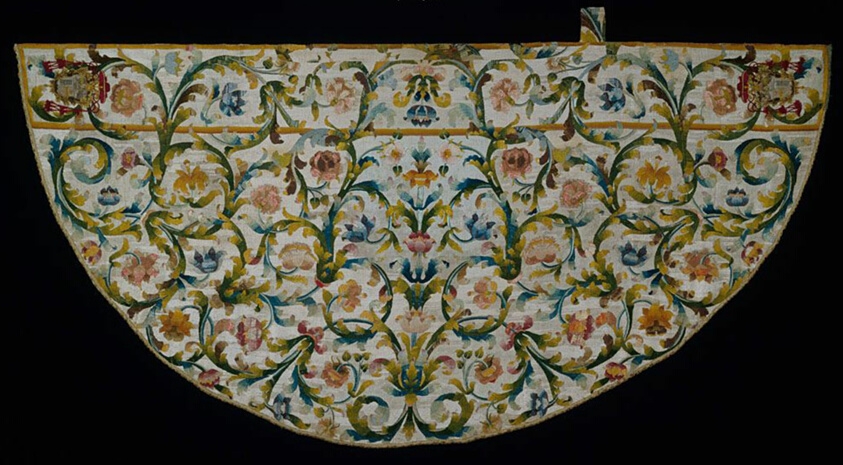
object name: Textile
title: Cope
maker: Spain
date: 1675/1700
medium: Linen, plain weave; embroidered with silk in satin, padded satin and split stitches; laid work and couching; lined with linen, plain weave; edged with silk, warp-faced plain weave with cut weft fringe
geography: Spain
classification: textile; needlework (visual works); costume; liturgical